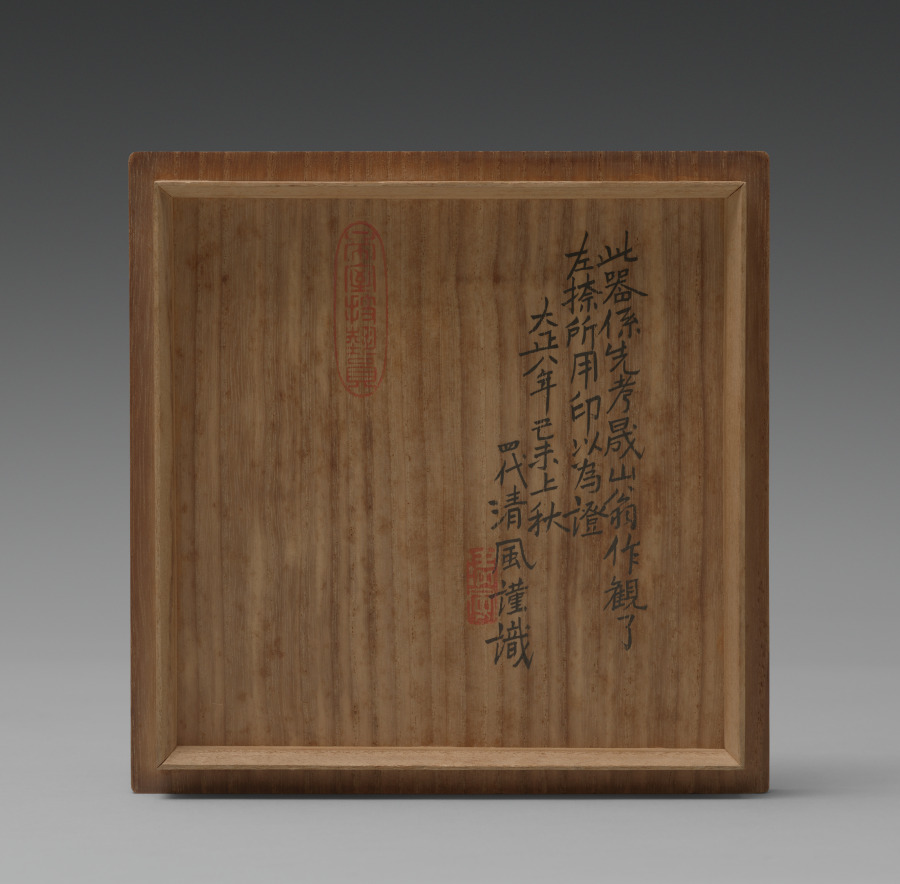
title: Flower Vase with Butterflies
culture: Japan, Meiji period (1868–1912)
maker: Seifū Yohei III (Japanese, 1851–1914)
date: 1907–14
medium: Porcelain with green glaze and carved and molded design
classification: Ceramic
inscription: 清風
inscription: 【印】 帝室技芸員。 【印】 清風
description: This flower vase has two pairs of butterflies forming low-relief roundels, one on each side. The butterflies face each other, one positioned above and the other below, their antennae curling up to a centrally placed floral motif. In the spaces between the pairs of insects, additional raised floral designs are set within vinelike extensions reminiscent of open metalwork banners and canopy adornments in Buddhist temples. The lip and the foot of the vase remain white, and the thinning of the green glaze within the higher-relief portions of the body decoration accentuates the designs. This work, like the sweets bowl CMA 2022.232, has a box lid attribution to Yohei III by Yohei IV. His inscription is dated to the autumn of 1919.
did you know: The box identifies the vase as in the hisokuyō (Chinese mise yao 秘色窯), or “mysterious color ware,” style.